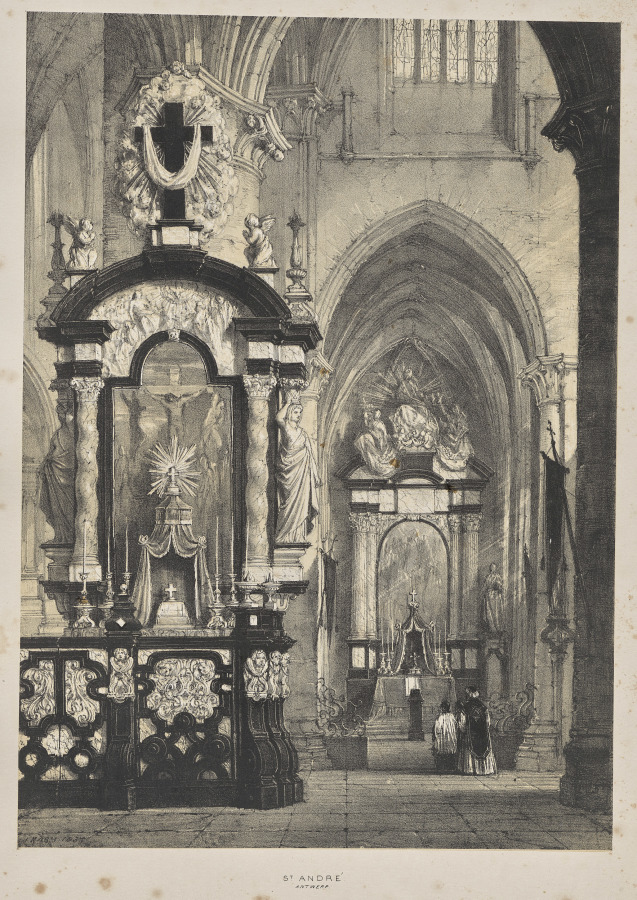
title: Architecture of the Middle Ages: St. Andre, Antwerp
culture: England, 19th century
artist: Joseph Nash (British, 1808–1878)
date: 1838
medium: lithograph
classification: Print